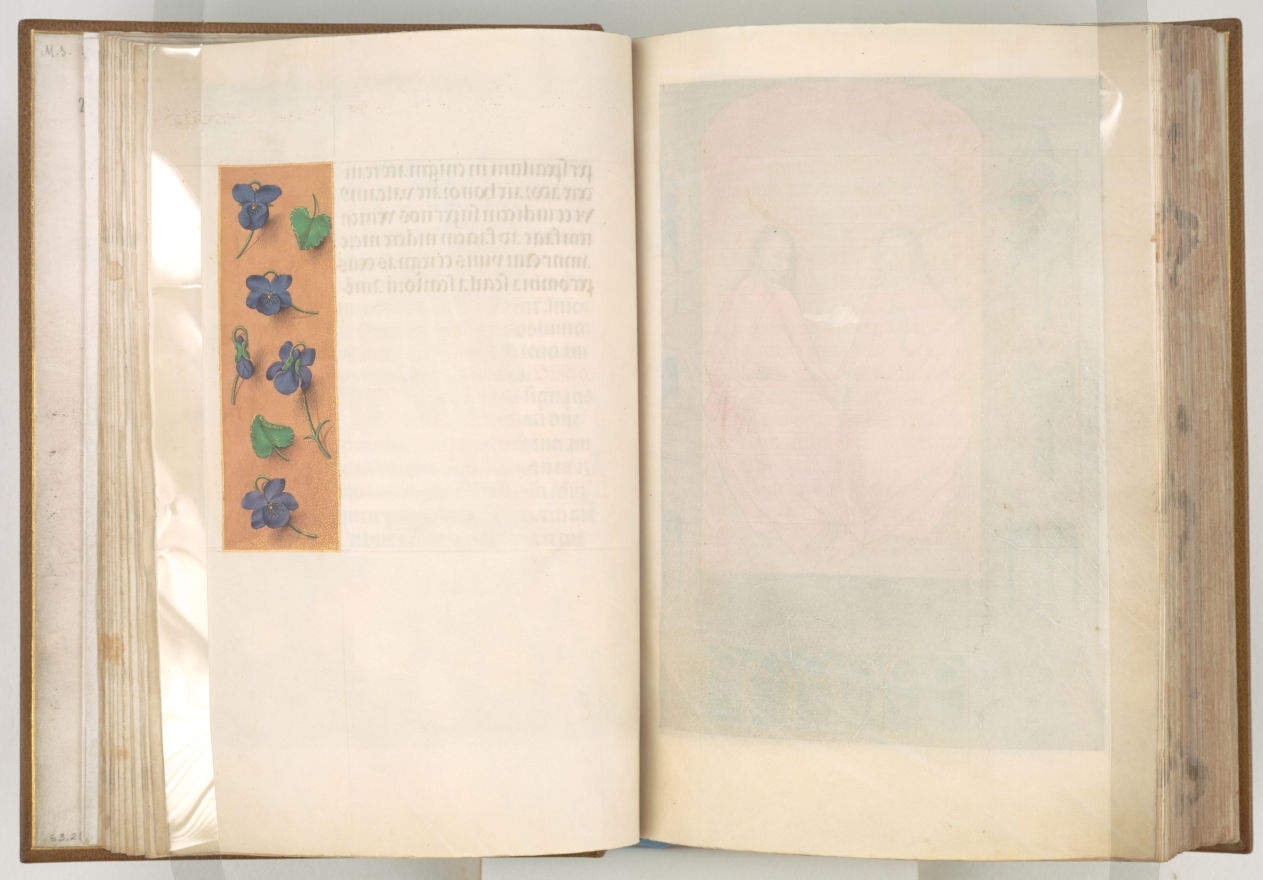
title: Hours of Queen Isabella the Catholic, Queen of Spain: Fol. 16v, Short Border with Strewn Violets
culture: Flanders, Ghent and Bruges, late 15th century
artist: Master of the First Prayerbook of Maximillian (Flemish, c. 1444–1519)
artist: and Associates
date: c. 1500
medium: ink, tempera, and gold on vellum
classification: Bound Volume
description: This manuscript was illuminated by a circle of at least five highly organized manuscript painters active in the Flemish cities of Ghent and Bruges. The principal illuminator was Alexander Bening, who painted the majority of the book's miniatures. Manuscripts produced by this circle of artists are renowned for the decoration of their borders, which typically feature a rich variety of realistically-painted flowers, birds, and butterflies. This prayer book, called a book of hours, was intended not for a cleric, but for the private devotions of a lay person-in this case, Isabella the Catholic, Queen of Spain (1451-1504). Isabella's coat of arms embellishes the book's frontispiece. It is unlikely that the book was commissioned by the Queen herself; rather, she probably received it as a diplomatic gift from someone courting her patronage, perhaps Cardinal Francisco Jimenez de Cisneros. A Franciscan friar, Jimenez was dependent upon Isabella for his advancement, first to the post of Queen's confessor in 1492, and then to Archbishop of Toledo in 1495.